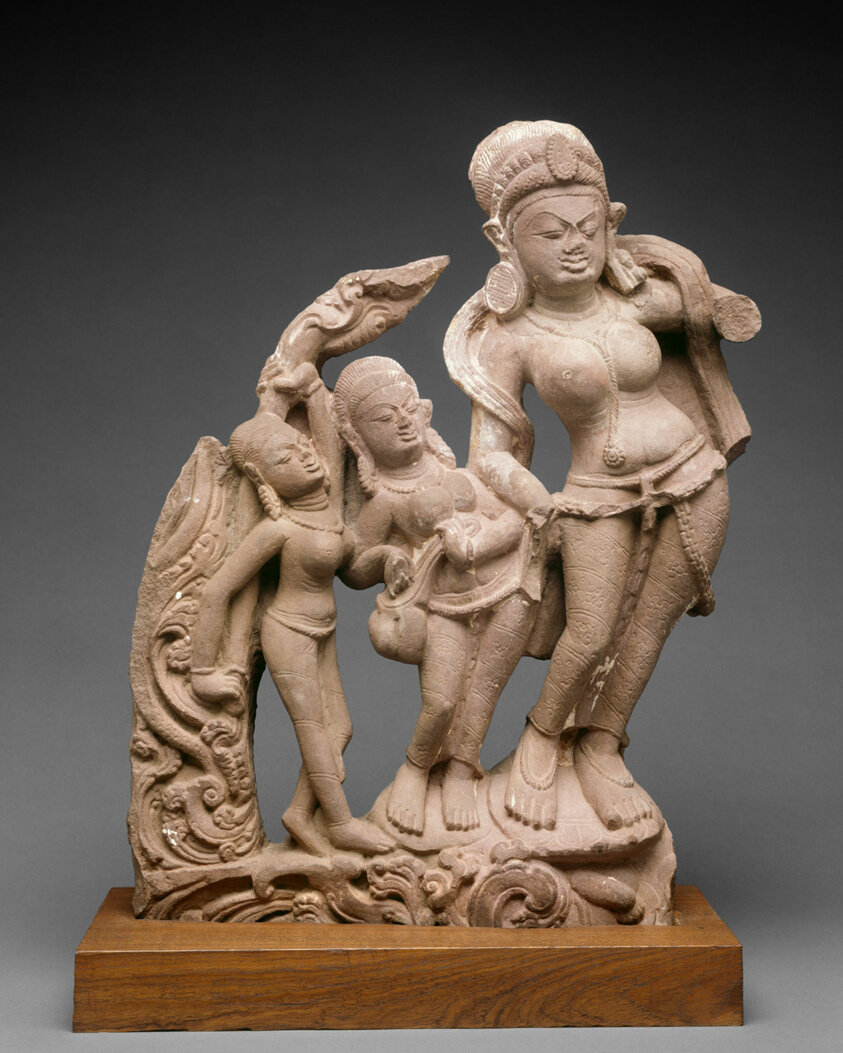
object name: Sculpture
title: River Goddess Yamuna with Attendants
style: South Asian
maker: India; Rajasthan or Madhya Pradesh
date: 9th century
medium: Sandstone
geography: India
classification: sandstone; stone; sculpture; asian art